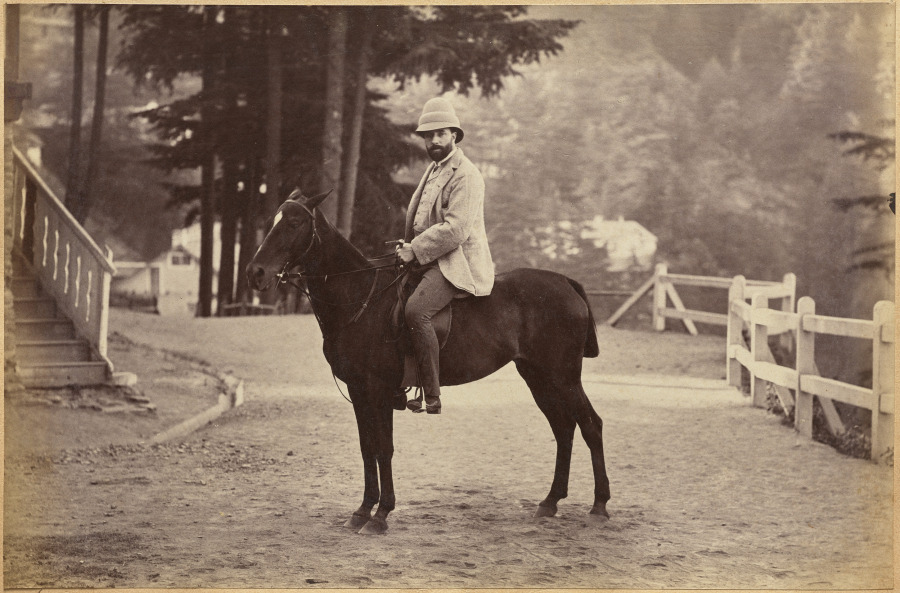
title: Mr. Nowell, Shimla (recto, bottom)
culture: India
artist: Raja Deen Dayal (Indian, 1844–1905)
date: c. 1882–87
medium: albumen print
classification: Photograph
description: These photographs are part of an album, now disassembled, of around 105 photographs taken in India between 1885 and summer 1887 that provide glimpses into the lives of the British colonial elite and royal and upper-class Indians. The museum holds another group of 37 pictures from this album (2016.266), which was probably commissioned by a British civil servant visiting or working in India around 1888 as a personal souvenir of his experiences there.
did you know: Raja Deen Dayal is regarded now, and was considered during his lifetime, to be India’s most important 19th-century photographer.